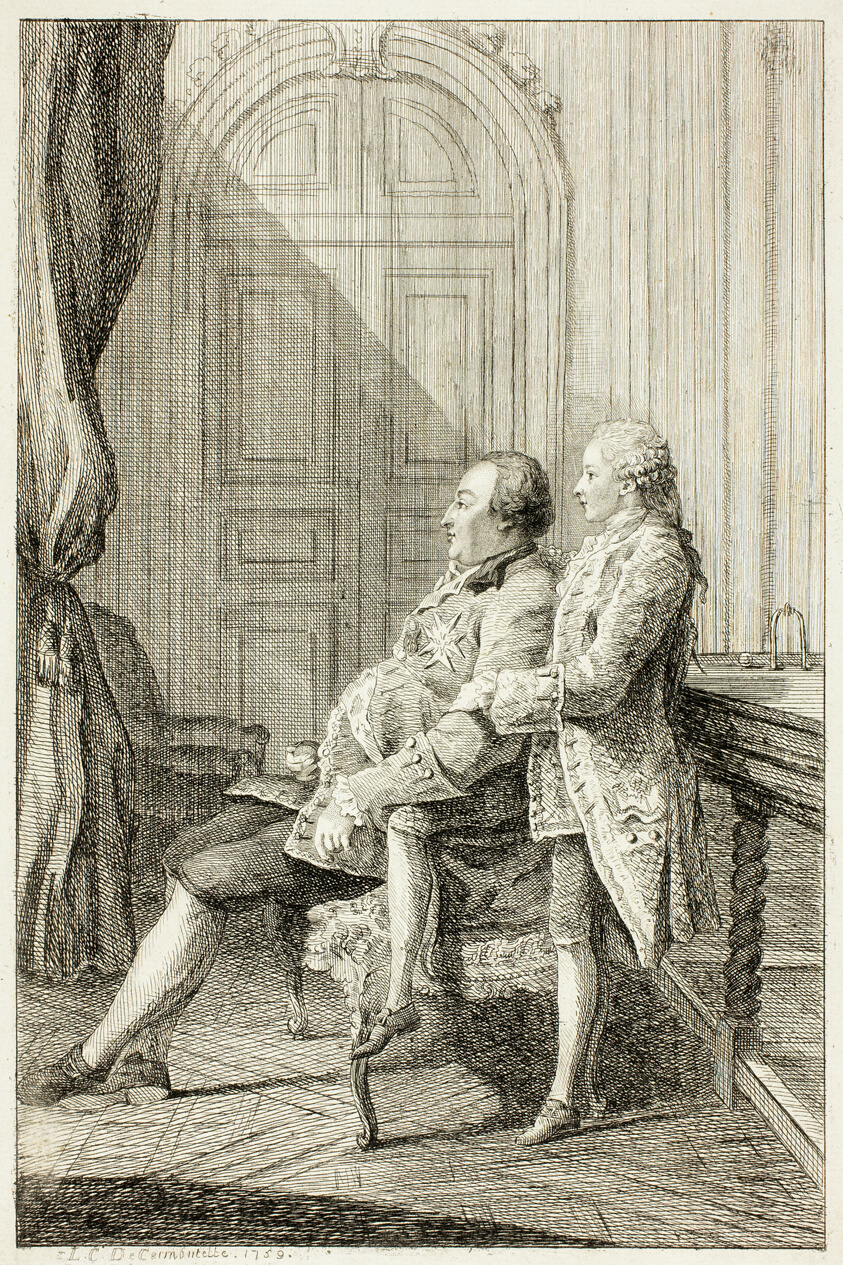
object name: Print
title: The Duc d’Orléans, and His Son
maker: Louis de Carmontelle (French, 1717-1806)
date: 1759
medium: Etching in black on ivory laid paper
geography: France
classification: etching; paper; print; prints and drawing